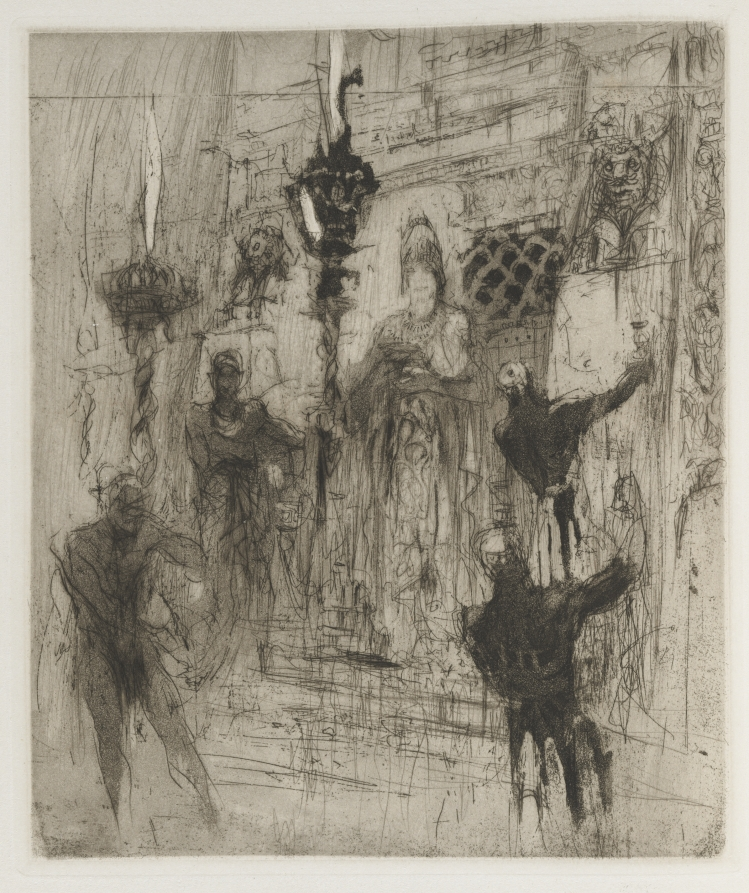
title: Herodias: Frontispiece, Herodias appeared, coiffed in an Assyrian mitre to which a chin strap was attached to the front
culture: England, 20th century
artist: William Walcot (British, 1874–1943)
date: 1928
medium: etching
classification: Print